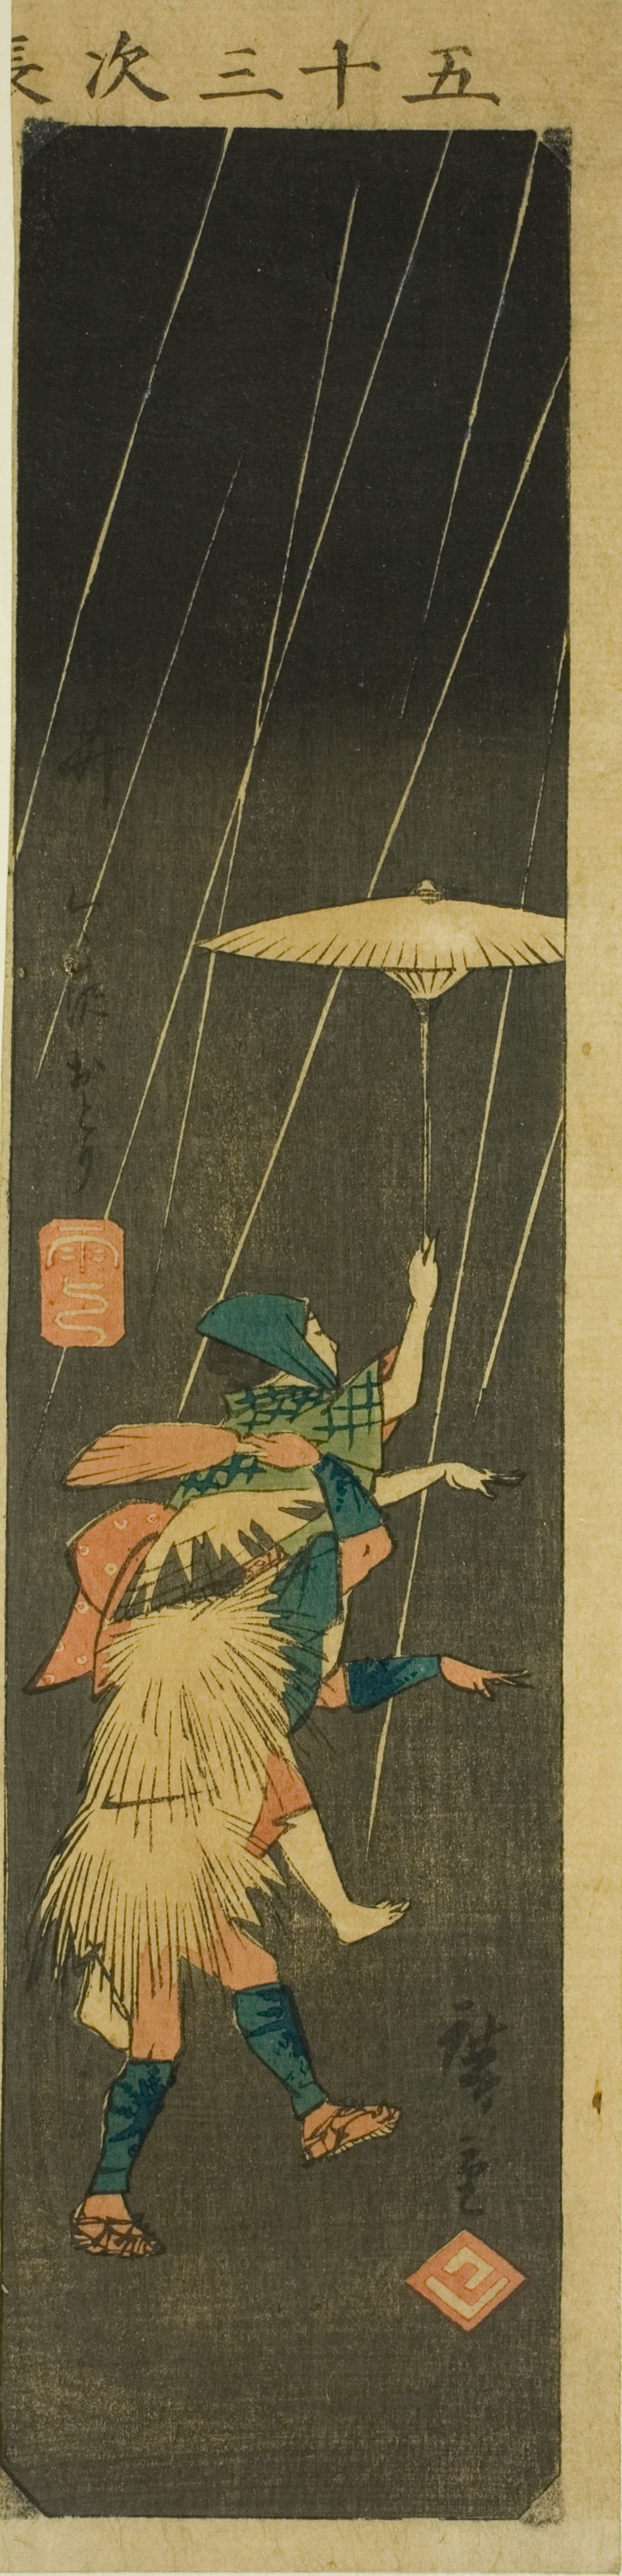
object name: Print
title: Yui: Kurusawa Dance (Yui, Kurusawa odori), section of sheet no. 5 from the series "Cutout Pictures of the Fifty-three Stations (Gojusan tsugi harimaze)"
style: Japanese (culture or style)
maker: Utagawa Hiroshige 歌川 広重; Japanese, 1797-1858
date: 1852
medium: Color woodblock print; section of harimaze sheet (uncut sheet: 1939.1294)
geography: Japan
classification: woodblock print; print; asian art